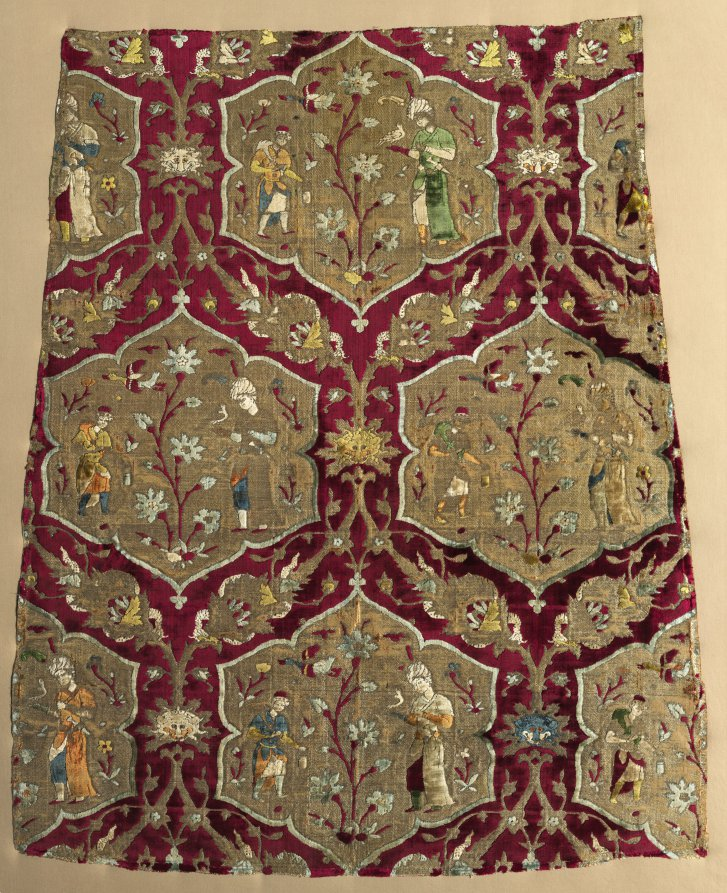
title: Fragment with falconer and attendant in animated lattice, from a robe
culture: Iran, Kashan, Safavid period (1501–1722)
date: mid-1500s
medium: Silk: velvet, brocaded, pile-warp substitution; gilt-metal thread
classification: Velvet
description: This velvet of Iran’s Safavid period (1501–1722) displaying a falconry scene is celebrated for its refined beauty and meticulous draftsmanship. A falconer and attendant flank a blossoming plant on a golden ground of lobed medallions. Animated vines display leaves bearing lion’s masks and dragons coiled around larger leaves on the crimson ground. Instead of two or three colors of velvet, Iranian weavers wove with as many as 14 colors, the most colorful velvets ever woven.